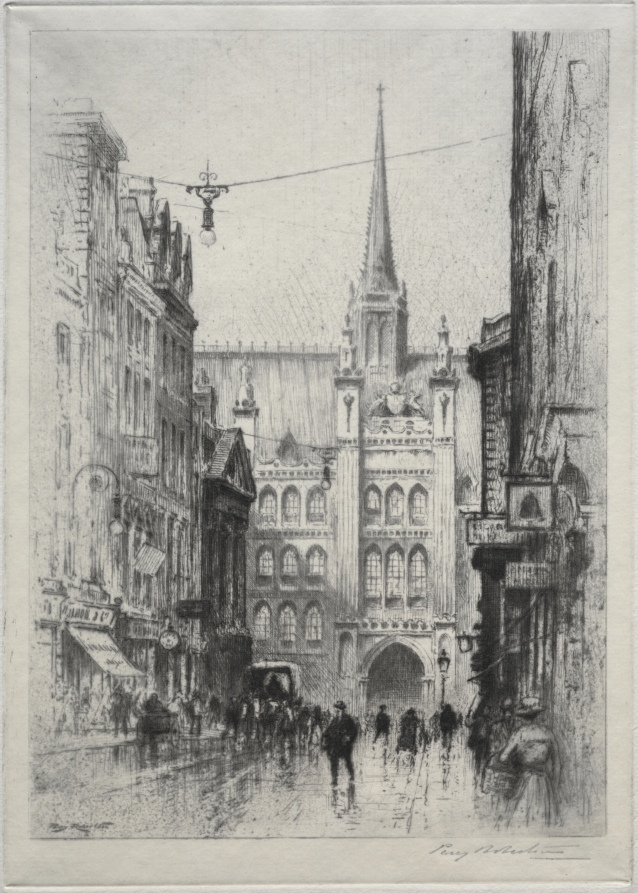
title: Guildhall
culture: England, 19th-20th century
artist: Percy Robertson (British, 1868–1934)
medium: etching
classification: Print